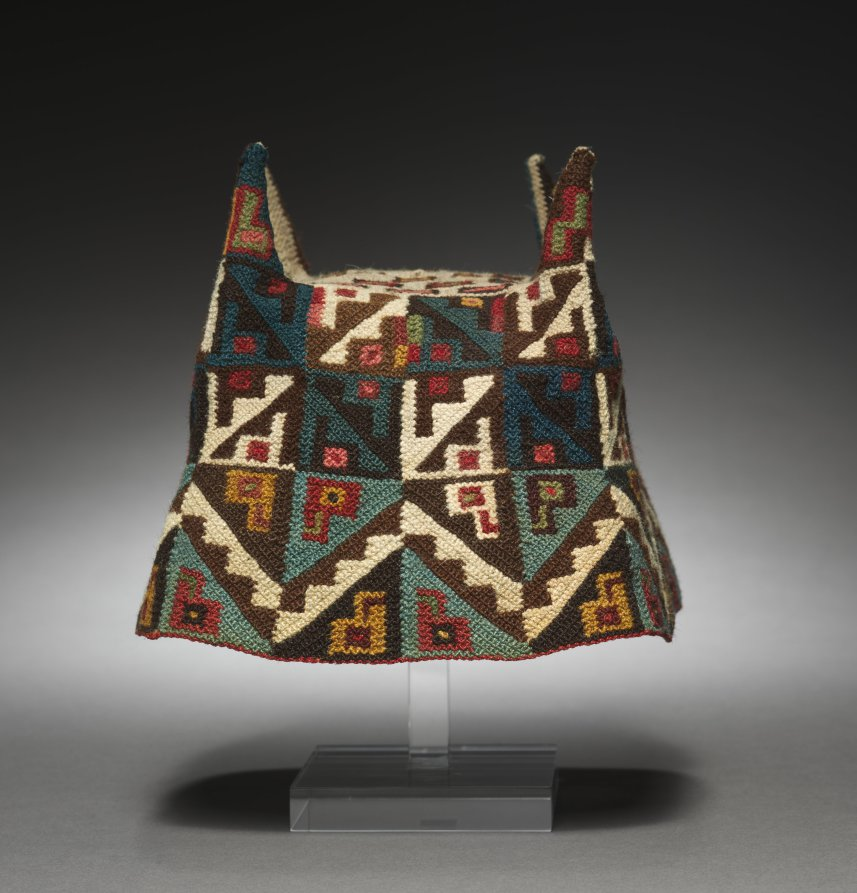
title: Four-Cornered Hat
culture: Peru, South Andes or Chile, Northern Andes, Tiwanaku style, 5th-10th Century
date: c. 400–1000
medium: alpaca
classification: Textile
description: A distinctive type of Tiwanaku and Wari headgear was a hat with four ear-like peaks rising from the corners. Depicted on warriors and other men who wear prestigious clothing and ornaments, the hats were made with knots, visible on all sides of this handsome Tiwanaku example. The hat is decorated with a pattern that includes a profile bird head.